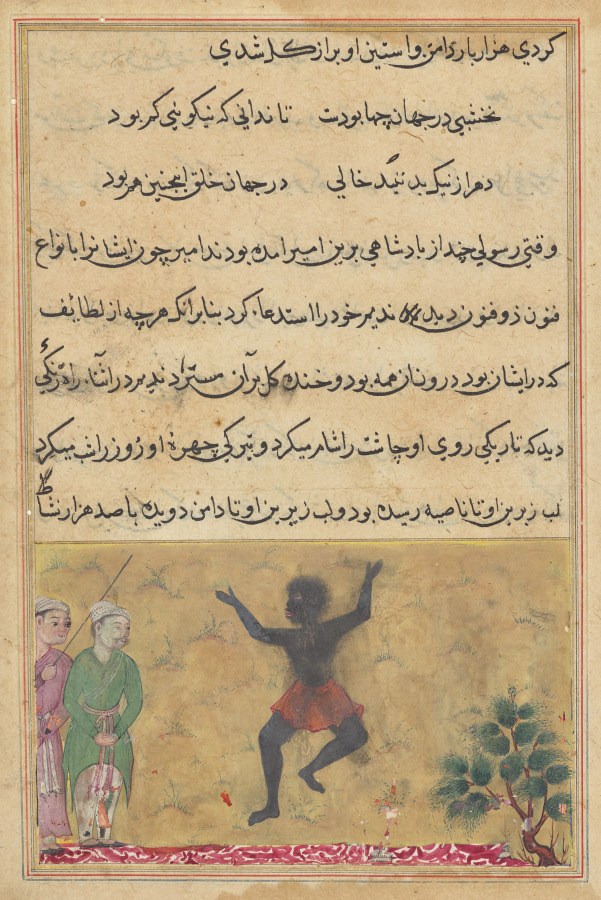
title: The court jester meets a Zangi dancing with joy, and learns from him that the cause of his happiness is his assignation with a woman who is the jester’s own wife, from a Tuti-nama (Tales of a Parrot): Twenty-second Night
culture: Mughal India, court of Akbar (reigned 1556–1605)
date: c. 1560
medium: gum tempera, ink, and gold on paper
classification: Painting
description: In the opening scene of the parrot’s bawdy story about a jester, who is shown wearing green on his way to perform at the court of the emir, he came upon an Ethiopian, known as Zangi, dancing by the side of the road. When he learned that the Zangi was overjoyed because he was planning to meet his beloved, the jester’s own wife, the jester was so distraught he was unable to perform, and the emir threw him in prison. The artist depicted the Zangi as described in the text as semi-wild with caricatured physical traits, uncovered head, and little clothing.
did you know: The tale references stereotypes about Africans that were current in India and Iran when the text was written.